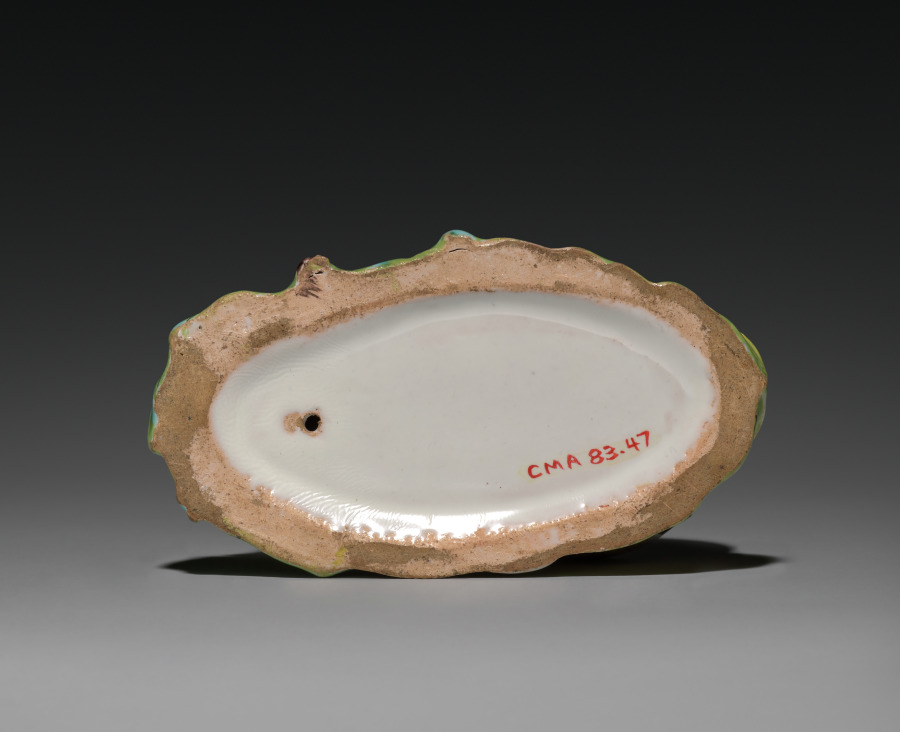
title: Box in the Form of a Snail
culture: France, 18th century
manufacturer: Strasbourg Factory (France)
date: c. 1750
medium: faience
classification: Ceramic